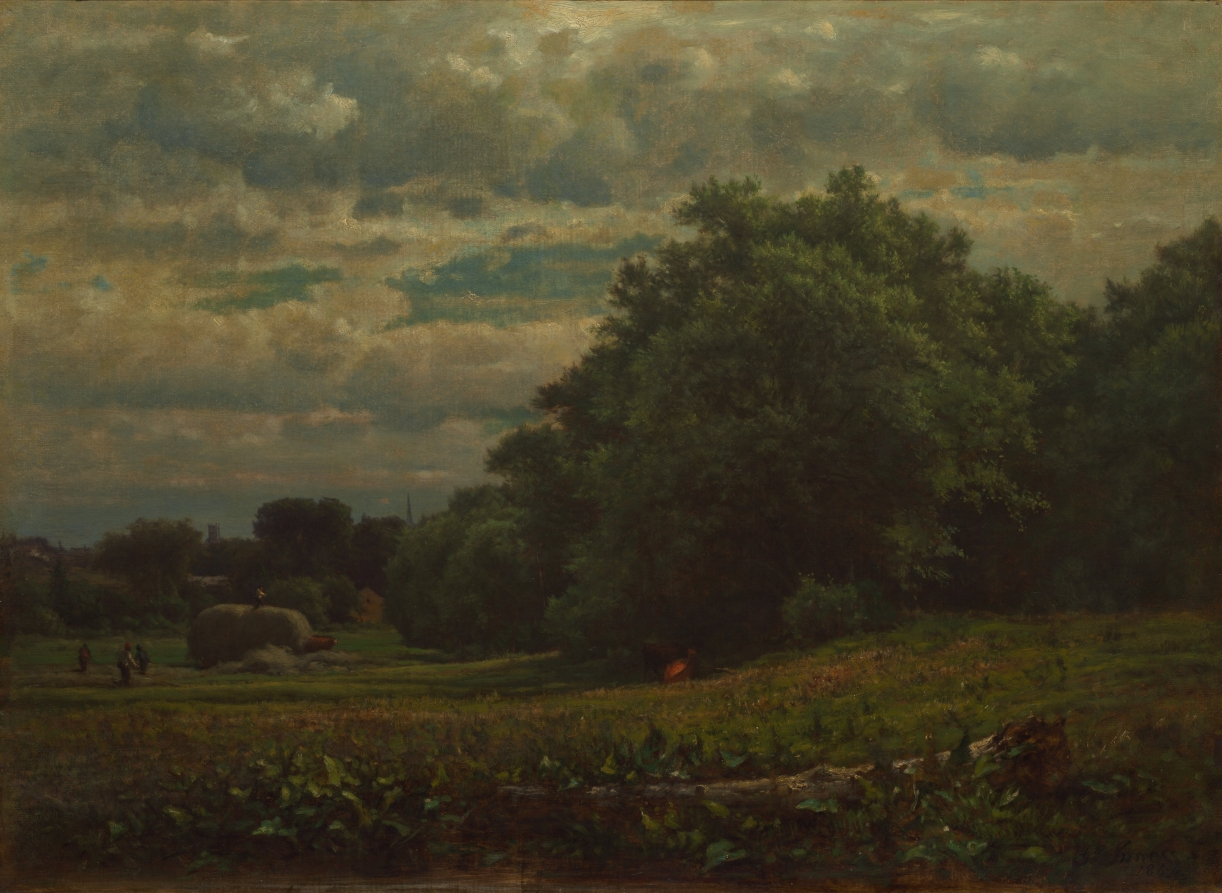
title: Harvest Time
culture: America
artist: George Inness (American, 1825–1894)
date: 1864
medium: oil on canvas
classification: Painting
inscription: Signed lower right: "G. Inness / 1861"